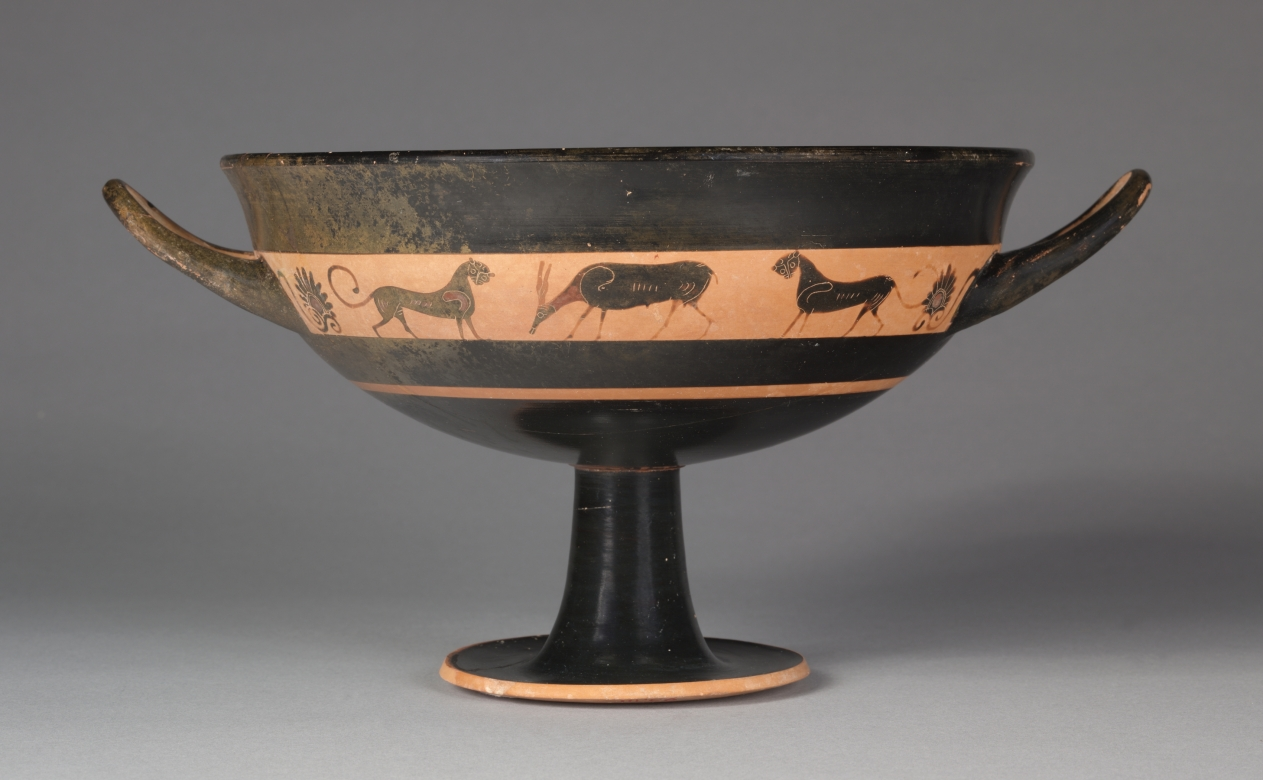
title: Black-Figure Band Cup: Stags and Panthers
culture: Greece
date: c. 540 BCE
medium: ceramic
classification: Ceramic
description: The two sides of this drinking cup are nearly identical, each with a reserved band holding a grazing stag between two panthers. A single palmette appears on either side of each handle, while a reserved circle inside the bowl holds a dot within concentric circles.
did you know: Band cups feature figural decoration only within a reserved band aligned with the handles.